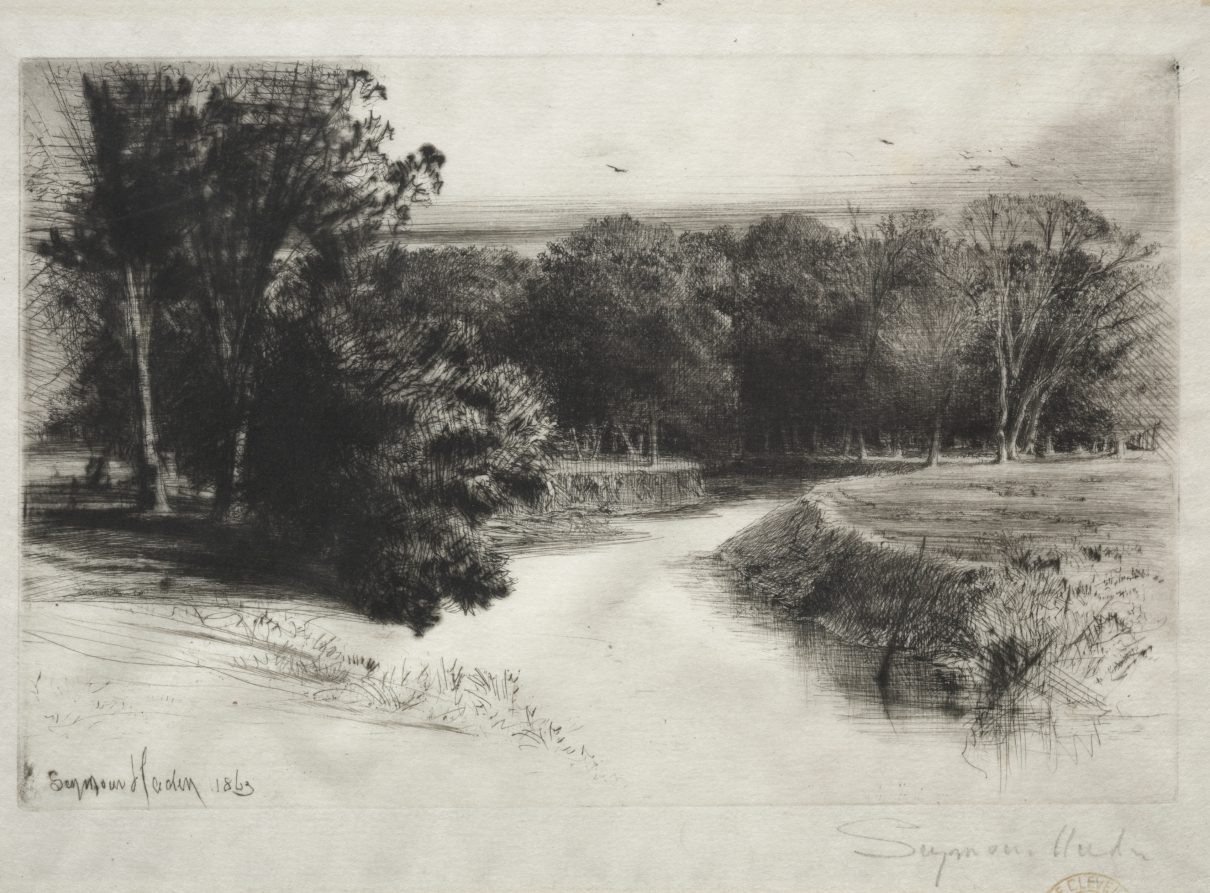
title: A Sunset in Ireland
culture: England, 19th century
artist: Francis Seymour Haden (British, 1818–1910)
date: 1863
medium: drypoint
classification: Print